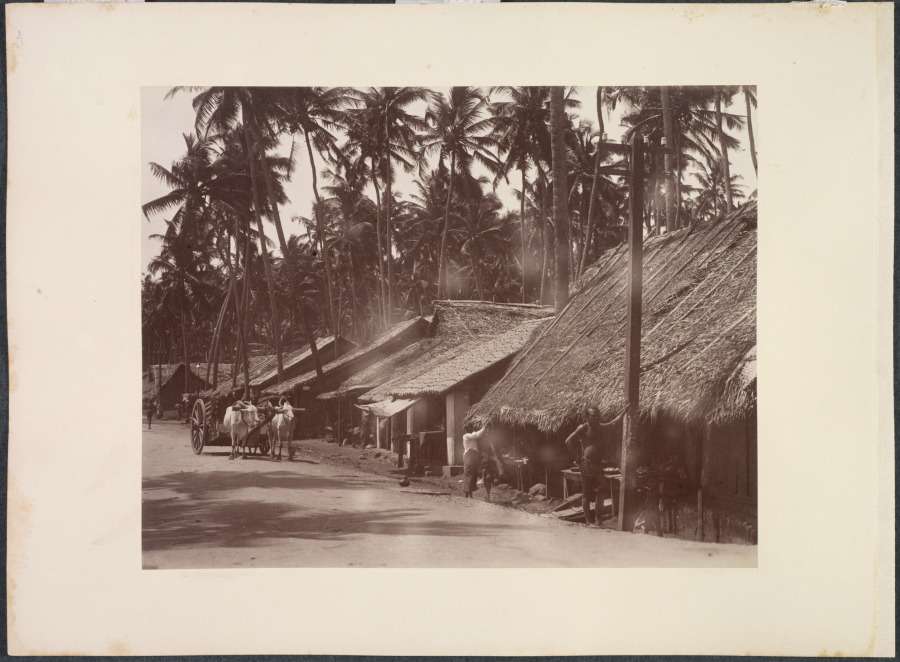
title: Untitled (verso)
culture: England, 19th century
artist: Skeen & Co. (British, active 1860–1920)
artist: Charles T. Scowen (British)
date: 1880s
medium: Albumen print, gold-toned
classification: Photograph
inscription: Written in pencil on mount with the image of the posed people: "6" Written in pencil on mount with image of oxen: "7" Written in pencil on verso of mat: "W.L.H. Skeen (1860-1900)/CEYLON, 1880s/gold-toned albumen print/1700 (Euros) 135 x 260 mm"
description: Probably taken by one of two British photographic firms based in Ceylon (present-day Sri Lanka), this image was likely shot by a European and was definitely made for a European audience, not for the individuals depicted. It is unlikely the sitters ever saw the finished photograph. Such ethnographic portraits were collected by governments as information, by tourists as souvenirs, and by “armchair travelers” as aids to the imagination. Viewers of the era would have regarded it more as a depiction of a cultural type than as a record of individual lives. Because interiors of temples were too dark to yield an image, the photographer arranged these Thai monks and worshippers along with some of their religious objects outdoors.